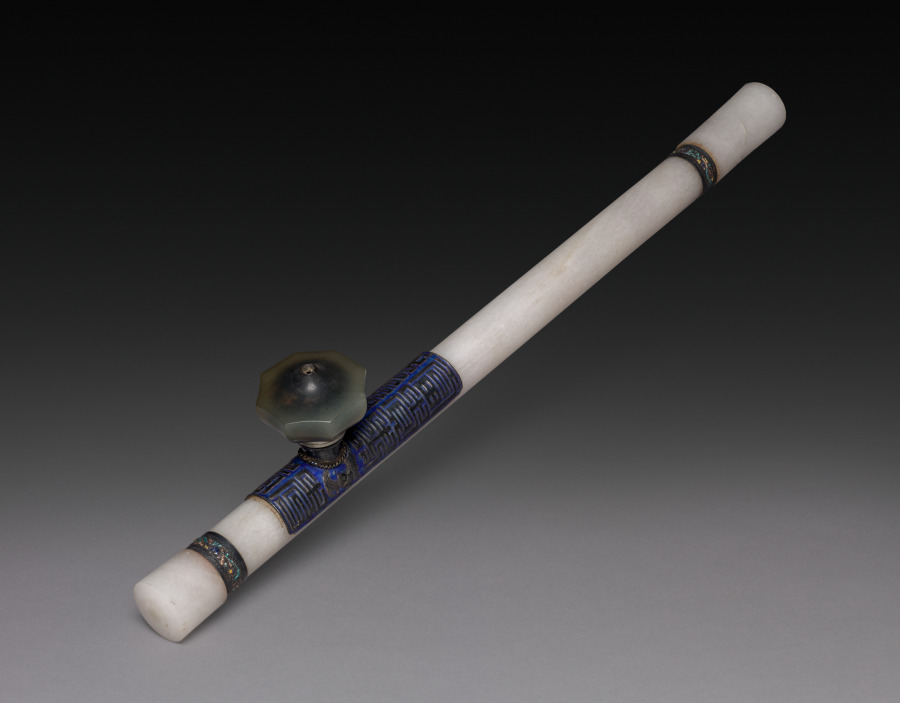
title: Opium Pipe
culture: China, Qing dynasty (1644-1911)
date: 1800s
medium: jade stem decorated with silver ferrules embellished with enamel; jade bowl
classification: Miscellaneous